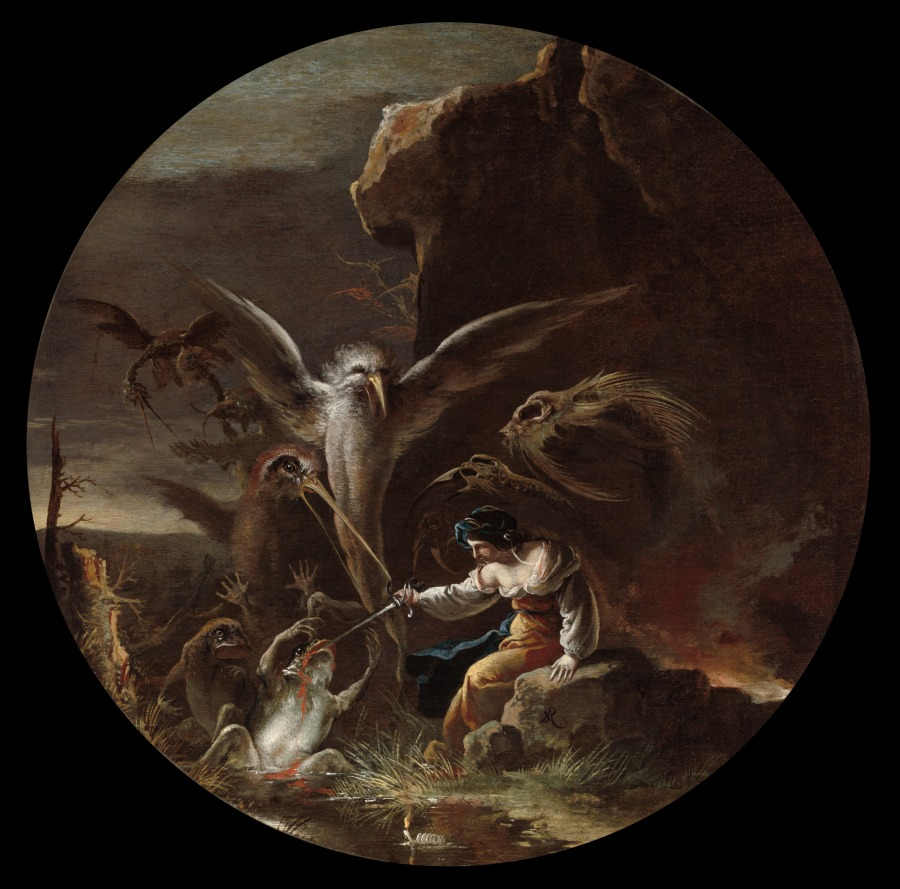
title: Scenes of Witchcraft: Morning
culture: Italy, 17th century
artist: Salvator Rosa (Italian, 1615–1673)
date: c. 1645–1649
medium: oil on canvas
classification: Painting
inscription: Signed: "SR [monogram]"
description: Rosa's first scene depicts a young witch who plunges her knife into a writhing amphibian at dawn. The dark clouds of daybreak and anthropomorphic crags provide a gloomy atmosphere, while malevolent birds with piercing beaks hover around the central stabbing, focusing the viewer's attention on the witch's vicious act. The only beautiful enchantress Rosa ever painted, her elegance and ability to transform men into animals evokes the goddess Circe. But Rosa wasn't interested in classical imagery; he inverted expectations by transforming Circe into an explicitly violent sorceress. Her calm expression makes the terrifying gesture of upraised human hands among the birds even more disturbing.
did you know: The artist chose the painting's shape to reference the foundational role of the circle in practicing magic.